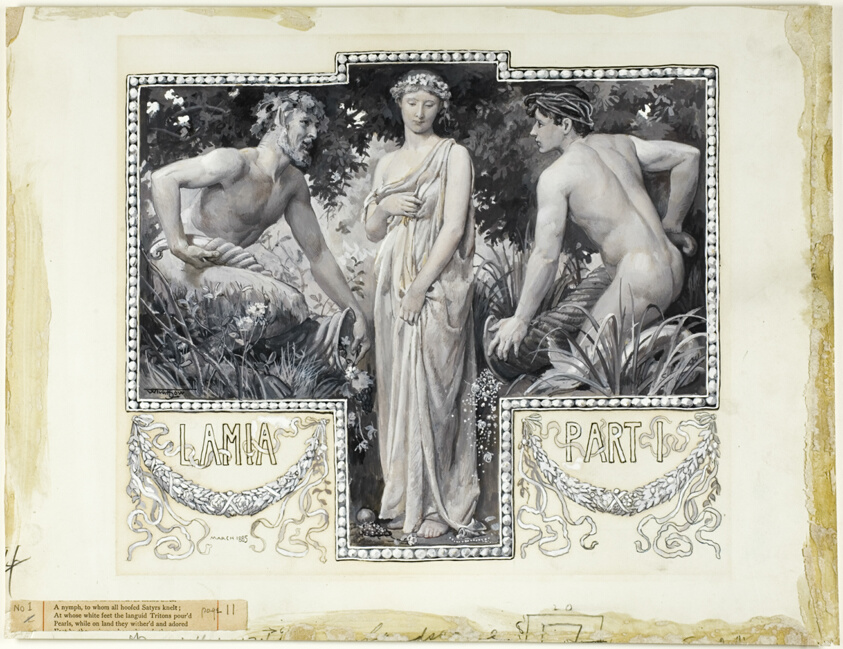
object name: Drawing and Watercolor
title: A Nymph, To Whom All Hoofed Satyrs Knelt Head-peice, Part 1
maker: Will Hicock Low (American, 1853-1932)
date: 1885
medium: Black, gray and white gouache, over traces of graphite, on cream wove card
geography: United States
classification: drawings (visual works); prints and drawing